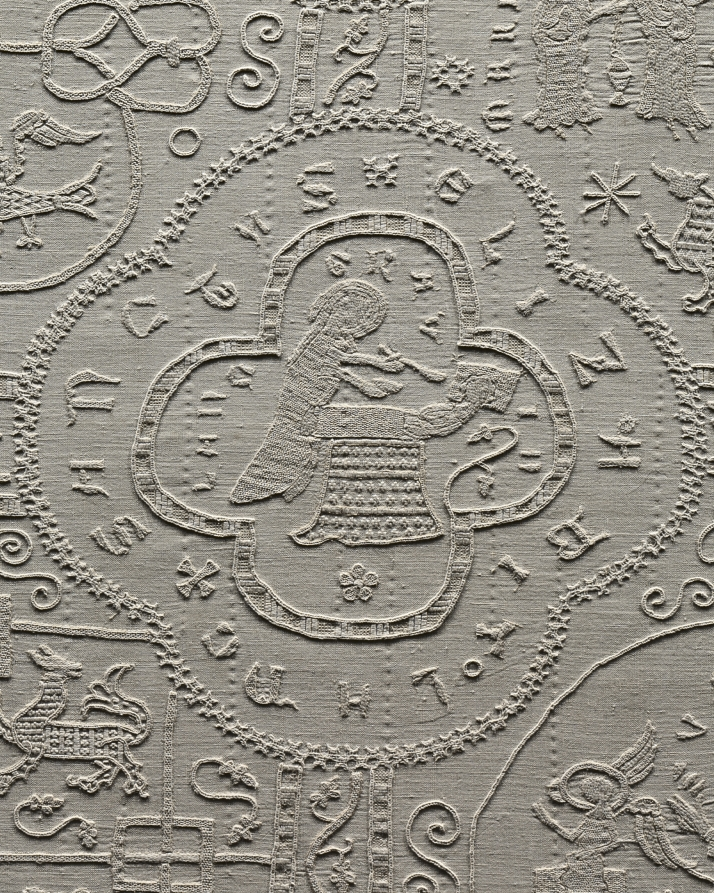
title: Altar Cloth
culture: Germany, Altenberg on the Lahn, Premonstratensian Convent, 14th century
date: c. 1350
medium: embroidery: linen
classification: Embroidery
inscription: various motifs enclosed in quatrefoils with identifying inscriptions in Gothic letters.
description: This large, embroidered altar cloth is one of the rarest, most important medieval church furnishings in existence. It was stitched by nuns in the Premonstratensian Convent in Altenberg on the Lahn River, north of Frankfurt, Germany, and was used to cover the church’s high altar in the weeks leading up to Easter. The cloth is an example of linen embroidery, a specialty of German nuns in the later Middle Ages. The Altenberg monastery church once had valuable furnishings; the high altar retable (a decorated frame with sculptures and paintings on the top of an altar) has survived, the main parts of which are now in the Städel Museum in Frankfurt, Germany.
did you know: When lit from behind, the previously hidden details emerge and the complex design becomes evident.